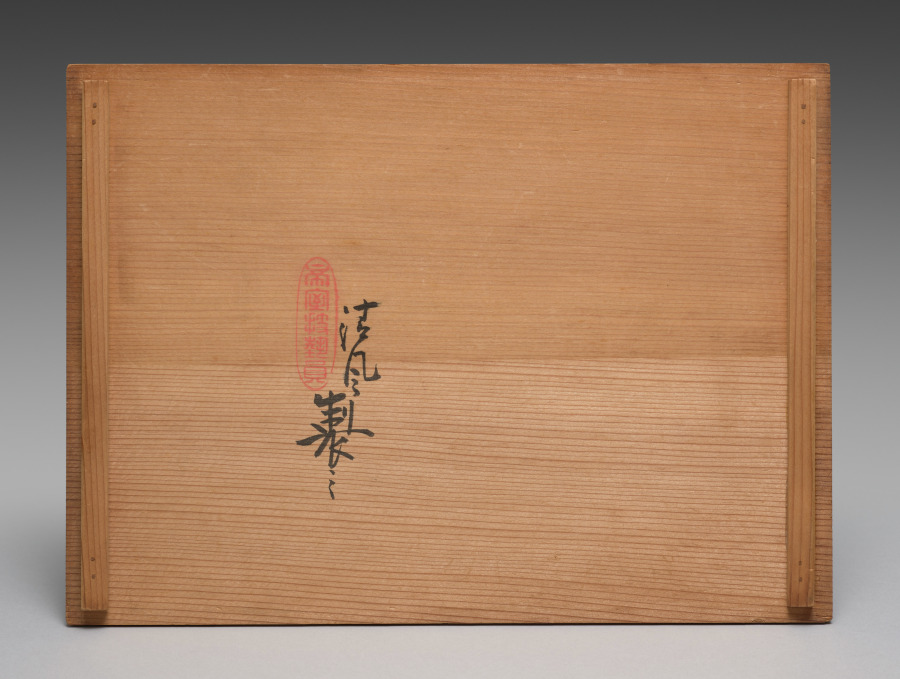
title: Tea Set with Chinese Landscapes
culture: Japan, Meiji period (1868–1912)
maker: Seifū Yohei III (Japanese, 1851–1914)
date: 1893–1914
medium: Tea set with tea pot, hot water cooler, and five cups; porcelain with underglaze blue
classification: Ceramic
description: The theme of this sencha tea set is the Chinese scholar-recluse in an idyllic landscape. The teapot depicts two friends playing a board game on a promontory beyond a two-storied residence, while another figure comes across the entry bridge bearing bags of provisions, hung from the ends of a pole balanced across his shoulders. The kidney-shaped water cooler has a scene of a man gazing at a full moon in a dramatic mountain-scape stretching before a large compound in the woods. Another man, hunched over and carrying a heavy parcel tied to a pole over his shoulder, struggles to make his way up a hill to the site. The cooler also has a pair of applied nyoi staff-head forms for resting the tips of one’s thumb and index finger, like those on the water cooler with pine trees (see [19 ]). Each of the five teacups has a landscape with an architectural structure and some human activity. One cup shows a man with a staff walking away from a residence toward a boat, loaded with what might be a musical instrument wrapped for travel. A second cup shows a man rowing a little skiff, which disturbs the otherwise still water. Behind him in the distance is an open-air pavilion. He is making his way toward a pair of figures playing a board game, much like the scene on the teapot. Down the hill from them is a residence; beyond this, a flock of geese approaches through the sky. A third cup shows a man in a traveling robe leaning upon his staff as he crosses a bridge to reach a two-story building with a pitched roof, possibly a temple, set between trees. Past this structure, another man sits fishing in a boat. A fourth cup shows a humbly dressed man with a broad-brimmed hat lugging a package tied to the end of a rod slung over his shoulder. In front of him is a two-story building flanked by deciduous trees and a man resting against the side of a sturdy stone bridge as he looks at a residence, or perhaps a set of roofed gates, further up the path. The last cup has a man walking toward a group of three pavilions announced with a banner hanging from a tall post; beyond this are two large deciduous trees sheltering a stand of small conifers. Across the water from this site is another man sitting on the bank fishing with a large woven basket for his catch beside him.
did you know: Images of famous sencha events that shows that these kinds of porcelains fit with objects, such as a stove and kettle, to form a complete set of utensils for tea preparation, and with ensembles of decorative objects meant to inspire creativity.